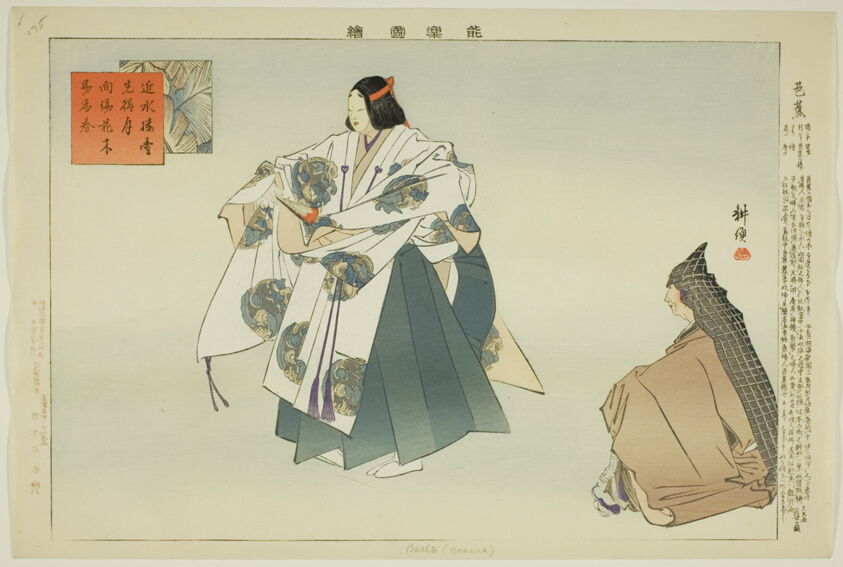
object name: Print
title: Basho, from the series "Pictures of No Performances (Nogaku Zue)"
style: Japanese (culture or style)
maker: Tsukioka Kogyo; Japanese, 1869-1927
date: 1898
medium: Color woodblock print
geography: Japan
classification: woodblock print; print; asian art